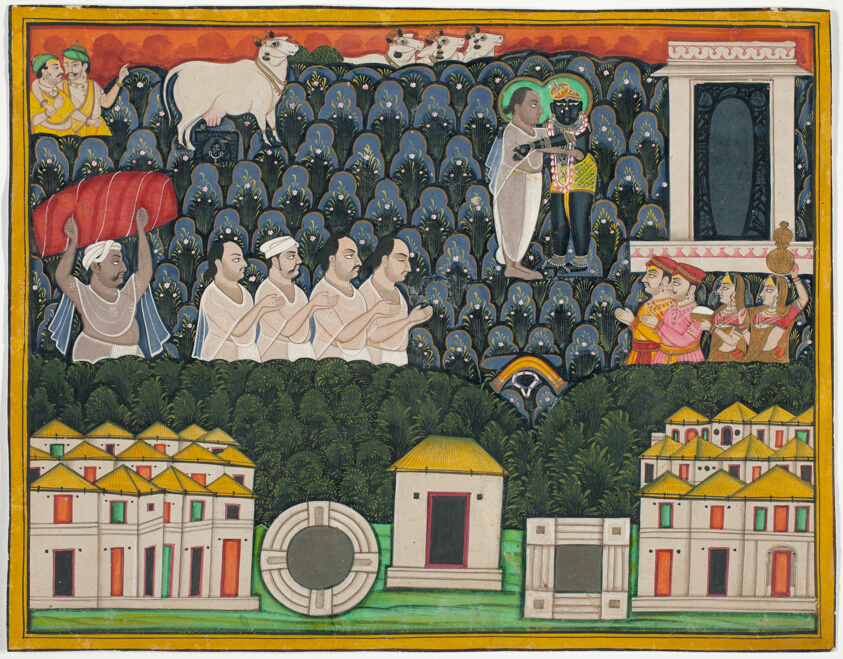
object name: Painting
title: Pratham Milan, Shrinathji revealing himself to Vallabhacharya on Mount Govardhan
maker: India; Rajasthan, Nathdwara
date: Early 19th century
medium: Opaque watercolor with ink and gold on paper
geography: India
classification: watercolor; painting